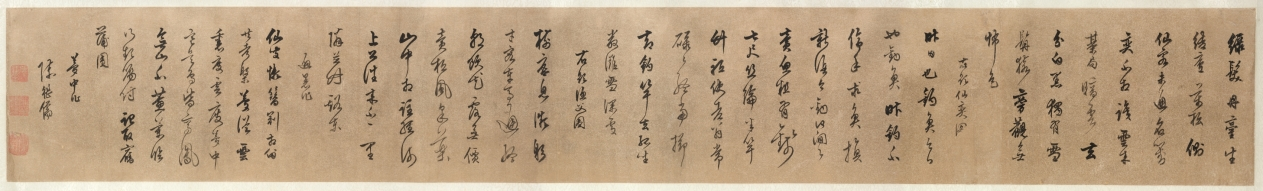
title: Four Poems: Calligraphy in Cursive Script (xingshu)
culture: China, Ming dynasty (1368–1644)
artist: Chen Jiru (Chinese, 1558–1639)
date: 1500s-1600s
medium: handscroll; ink on gold speckled paper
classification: Calligraphy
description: Written in graceful calligraphy with well-composed characters, the artist communicates his thoughts and state of mind in four poems. Characters written in dark, thick strokes convey rhythm, and indicate the moment after the writer had paused to recharge his brush with ink. Chen Jiru was a native of Huating (modern Shanghai). His calligraphy style resembles that of his friend, influential calligrapher Dong Qichang (1555–1636). Unlike Dong, Chen did not pursue government service: he burned his Confucian robes, declined a summons to serve at court, and immersed himself in literature, calligraphy, and painting.